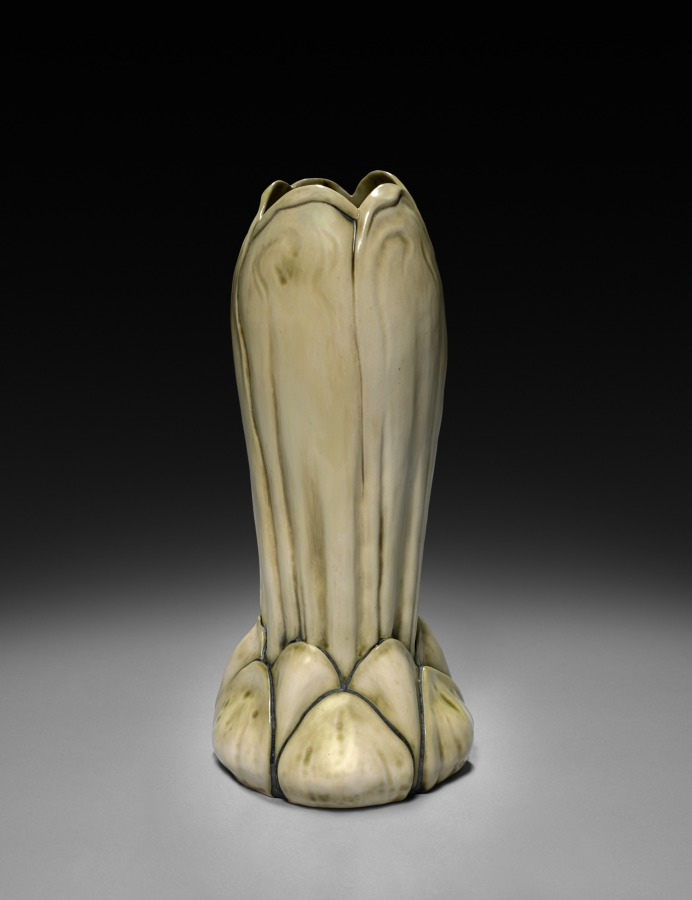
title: Artichoke Vase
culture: America, New York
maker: Tiffany Studios (United States, New York, 1902–32)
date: c. 1905–10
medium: Glazed white clay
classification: Ceramic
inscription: engraved on underside: LCT 7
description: By 1900 Louis Comfort Tiffany had expanded his empire by increasing the firm’s production of “fancy goods,” including inkstands, candlesticks, clocks, small boxes, desk sets, tea screens, and other functional objects. Along with the array of artistic glass designs from his factory in Corona, Queens, works in ceramic, bronze, other metals, and even jewelry abounded. These affordable luxury items were designed with as much thought to artistry as the great stained glass windows and lamps through which the firm enjoyed unrivaled success.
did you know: Ceramic works were Louis Comfort Tiffany's contribution to the art pottery movement of the early 1900s.